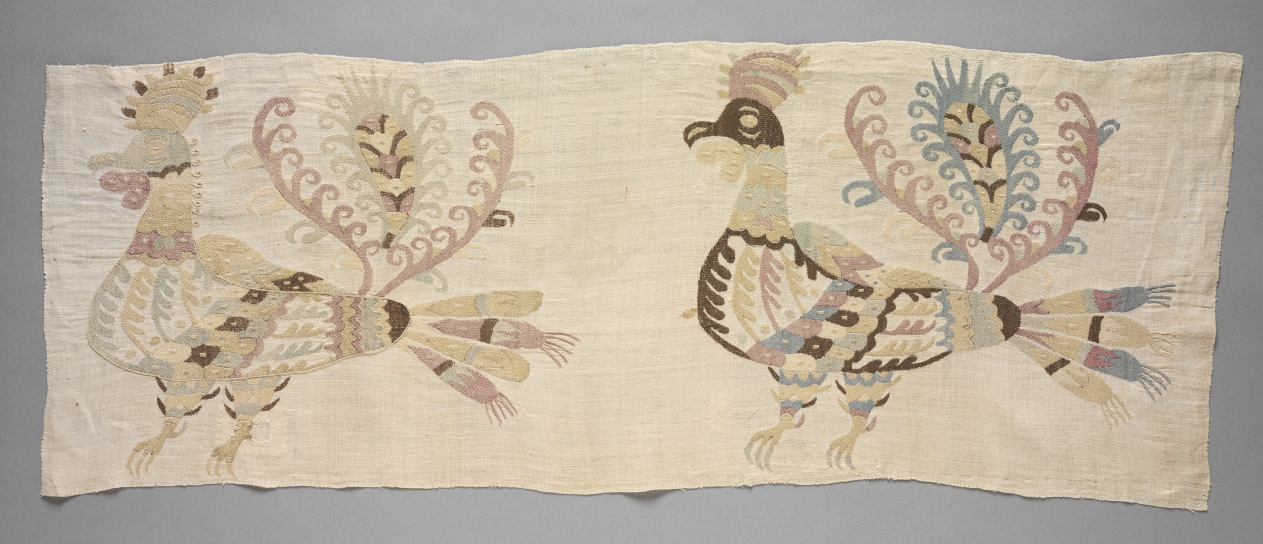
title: Panel, Fragment of Bedsheet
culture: Greece, Sporades Islands, Skyros, 18th century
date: 1700s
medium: embroidery: silk on linen tabby ground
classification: Embroidery